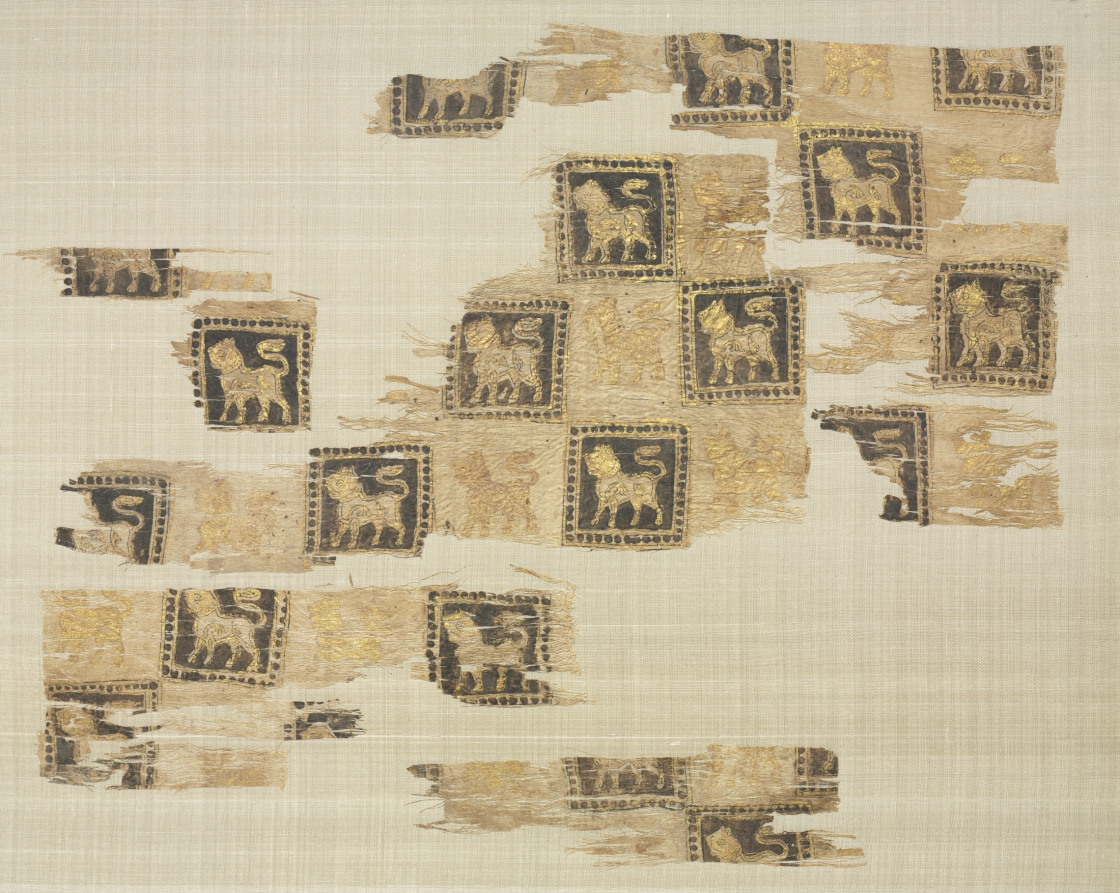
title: Fragment with gold leaf lions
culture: Iran or Iraq, Seljuk period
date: 1000s–1100s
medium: Silk warp and cotton weft (mulham): plain weave; gold leaf, block printed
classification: Textile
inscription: This textile belongs to a small group of printed and/or painted textiles made in Iran and Iraq during the 11th - 12th centuries. The design was printed on "mulham" (cloth having silk warps and cotton wefts) using several wooden blocks that were applied in at least seven steps. The lions, a popular motif in Seljuk art, are very similar to the lion incense burner exhibited in the case next to the carpet. Their long toes, typical of lions in works of art made in the eastern parts of Iran, suggest that this printed textile may have been made in the province of Khurasan.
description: Gold was block-printed onto mulham cloth with figures of lions—symbols of the royal hunt and imperial power. Gold lions adorned with collars and palmettes enliven squares on dark-brown and undyed mulham groups in a checkerboard layout. The pattern was printed with several blocks on the mulham surface. The process included drawing outlines with black ink and block printing with gold powder and dark-brown pigment, each mixed with a binding medium. The gold paint was flattened with rubbing, which created a good imitation of gold leaf.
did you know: This is one of the comparatively few printed textiles with extensive use of costly gold to have survived from the medieval period in Iran or Iraq.